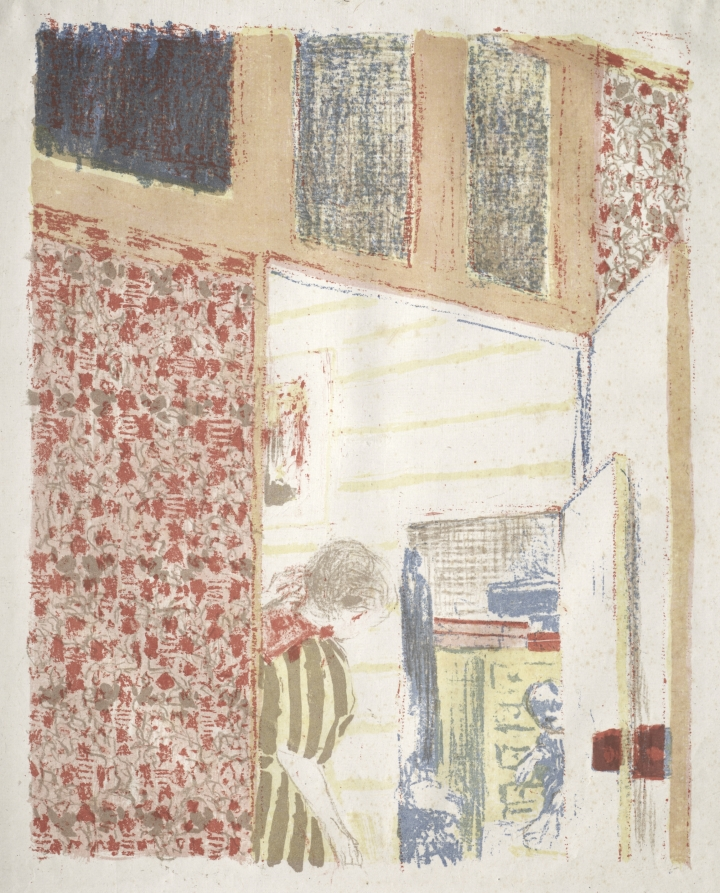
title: Interior with Pink Wallpaper III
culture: France, 19th century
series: Landscapes and Interiors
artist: Édouard Vuillard (French, 1868–1940)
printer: Auguste Clot (French, 1858–1936)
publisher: Ambroise Vollard (French, 1867–1939)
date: 1899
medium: color lithograph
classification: Print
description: The optical beauty of the patterning and luscious color of Interior with Wallpaper I, II, and III distracts from their ambivalent undercurrents. Across the three sheets, Vuillard creates an airless enclosure in which the wallpaper replicates itself, metastasizing across the surface and threatening the figures partially glimpsed through interior doors. Hidden figures recur in Vuillard’s work, adding an element of the uncanny to familiar settings.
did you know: Pattern and textile are paramount in Vuillard’s interiors, likely inspired by the many fabrics he would have encountered within his seamstress mother’s domestic atelier.